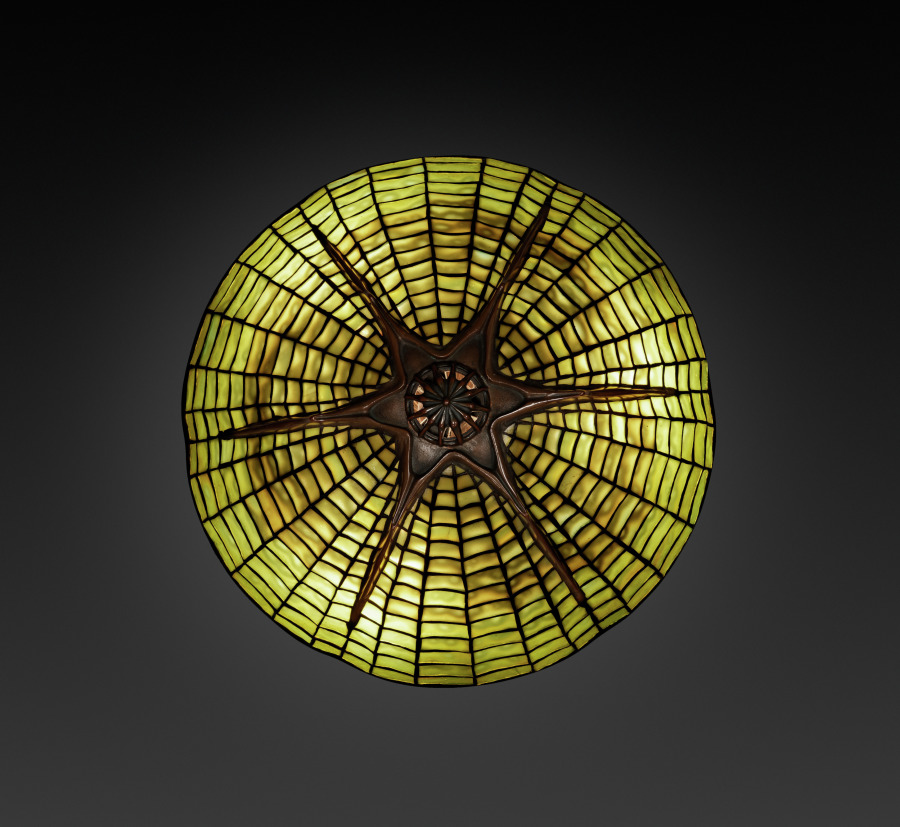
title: Spider and Web Table Lamp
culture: America, New York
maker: Tiffany Studios (United States, New York, 1902–32)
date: c. 1902–20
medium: Leaded glass, bronze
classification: Lamp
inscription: Shade impressed: TIFFANY STUDIOS NEW YORK 1424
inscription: Base impressed: TIFFANY STUDIOS/NEW YORK/337/ 2844 [scratched]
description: The dawn of the 20th century spurred fresh approaches to design. Louis Comfort Tiffany’s great contribution to this new art movement, termed the Art Nouveau, was not only the shimmering iridescence of his Favrile glass but also the naturalistic compositions of his lamps and windows, which brought him commercial and critical success in both Europe and America. Symbolic themes, such as the lurking spider in his web of this lamp, were a hallmark of Tiffany's Art Nouveau design.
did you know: The base of this lamp resembles an upturned mushroom.